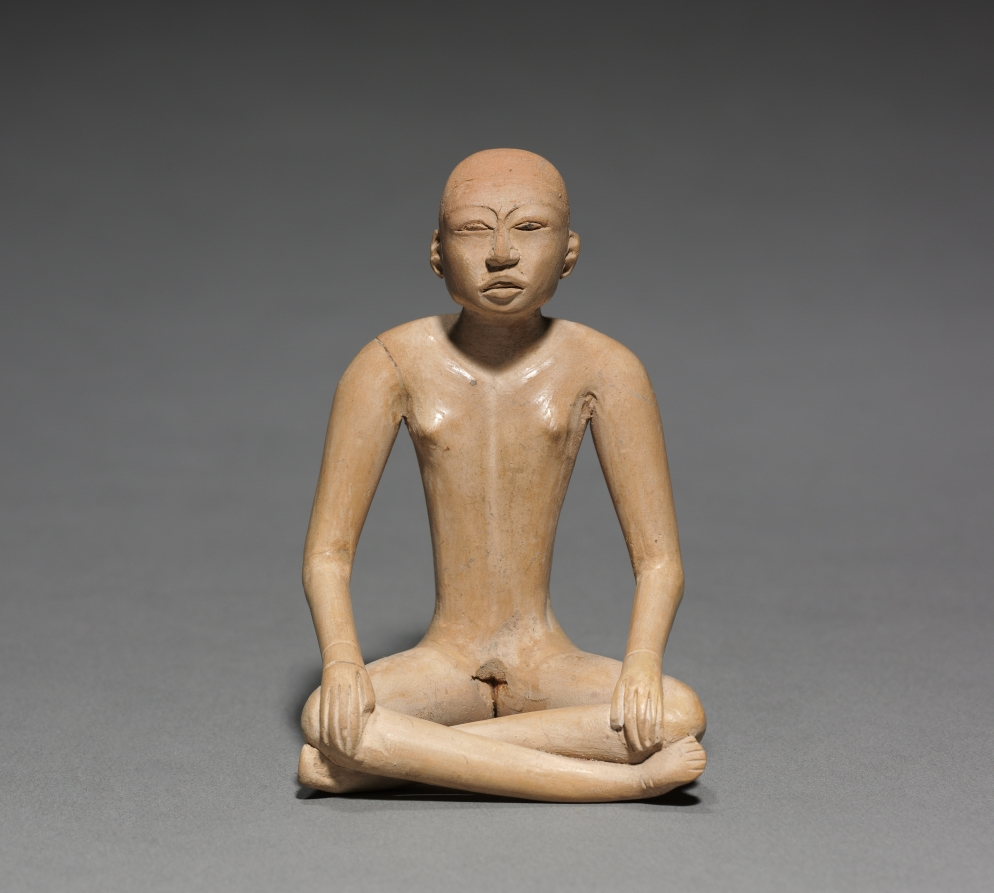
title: Seated Figurine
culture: Mexico, Gulf Coast, Huastec, Pánuco style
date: 1–700 CE (thermoluminescence date, 225–1055 CE)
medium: earthenware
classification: Sculpture